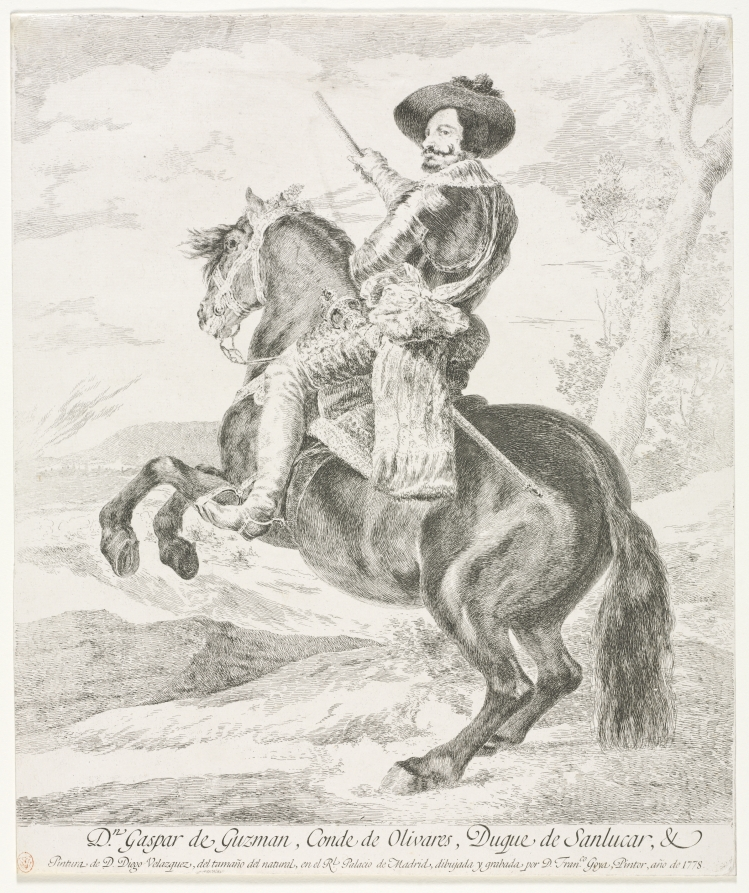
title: Gaspar de Guzman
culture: Spain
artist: Francisco de Goya (Spanish, 1746–1828)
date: 1778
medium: etching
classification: Print